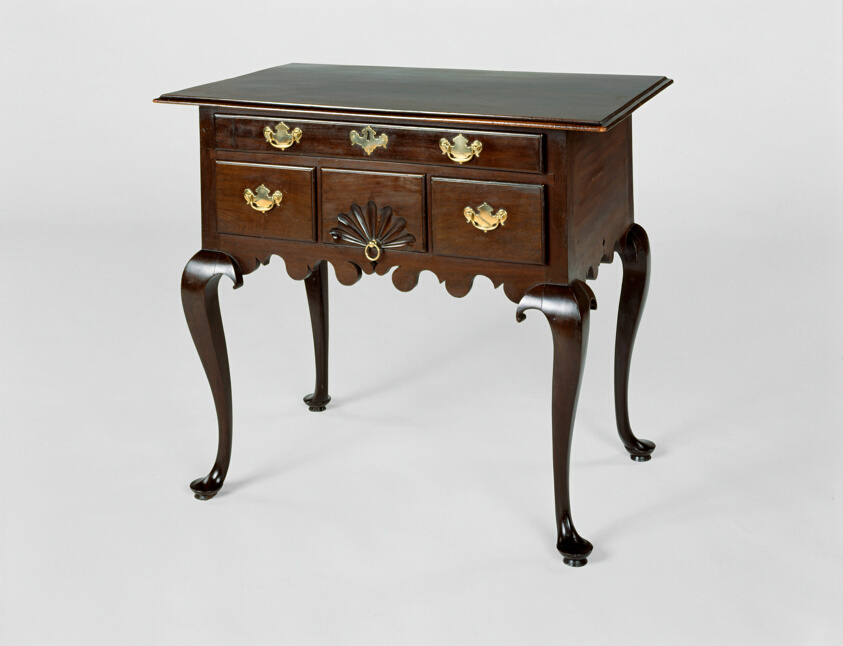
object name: Furniture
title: Dressing Table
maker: Artist unknown (American, 18th century); Salem, Massachusetts area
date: 1750–70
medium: Mahogany and white pine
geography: Salem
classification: table; furniture; american decorative arts; american arts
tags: fashion, furniture